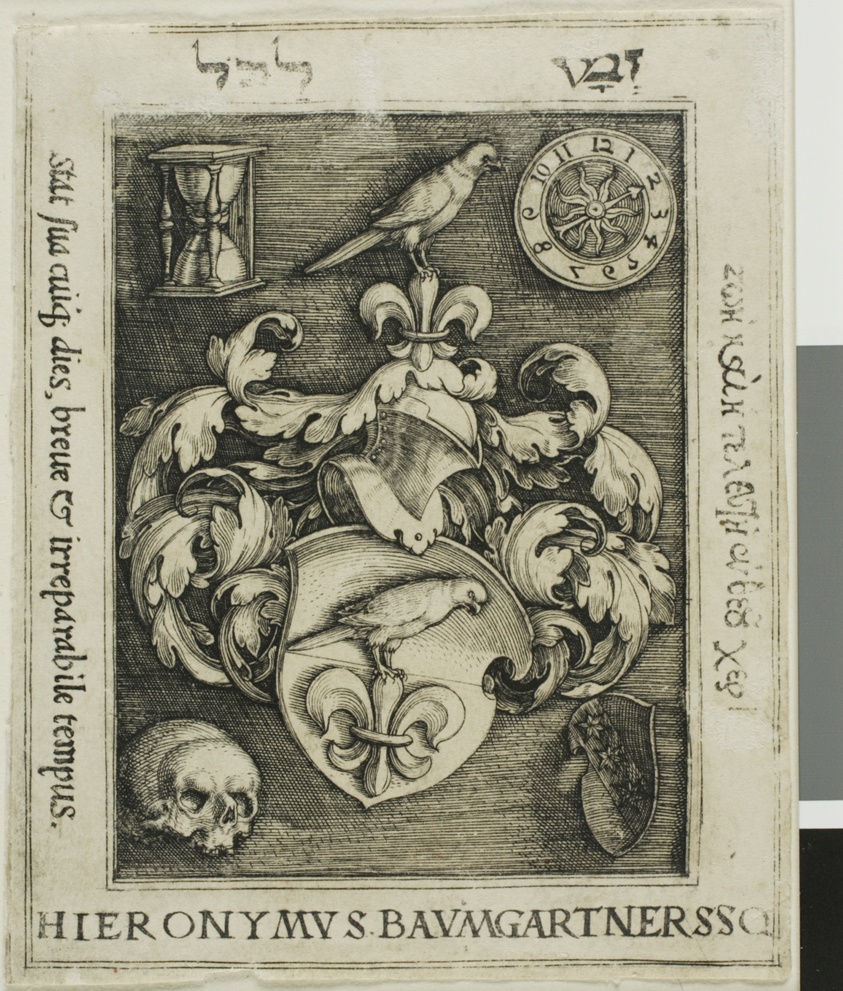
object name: Print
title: Bookplate of Hieronymous Baumgärtner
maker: Barthel Beham (German, 1502-1540)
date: 1522/40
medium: Engraving in black on ivory laid paper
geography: Germany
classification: engraving; print; prints and drawing